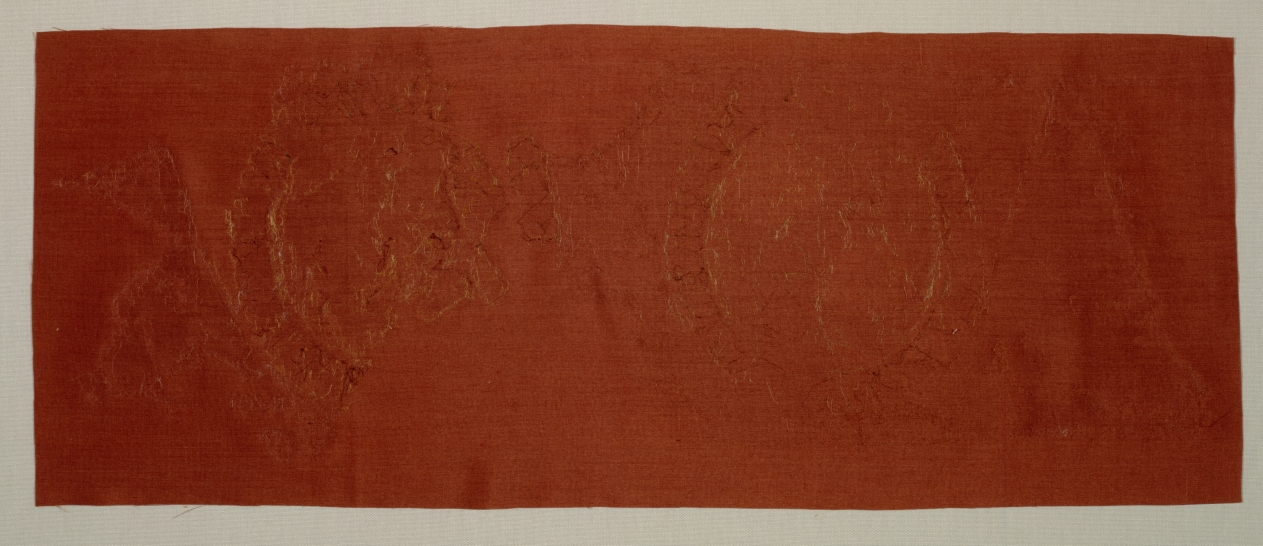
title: Celestial banquet hanging, from the tomb of Bishop Gurb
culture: Spain, probably Almeria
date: 1200–1284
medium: Silk and gold thread: plain weave with inwoven tapestry weave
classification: Textile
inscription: Arabic inscription bordering the roundels translates: "There is no god but God."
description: This rare silk fragment is from a luxurious hanging of brightly colored silk and shiny gold thread that displayed rows of figural roundels on a plain ground. The two turbaned men holding flasks flanking a palmette tree and the turbaned rider with a flying scarf are derived from the ancient Near Eastern imperial themes of the banquet and the hunt. The Arabic inscription framing each roundel proclaims, There is no god but Allah. This piece along with several others were reportedly found in the tomb of Bishop Gurb (died 1284) in the Cathedral of Barcelona in about 1890.